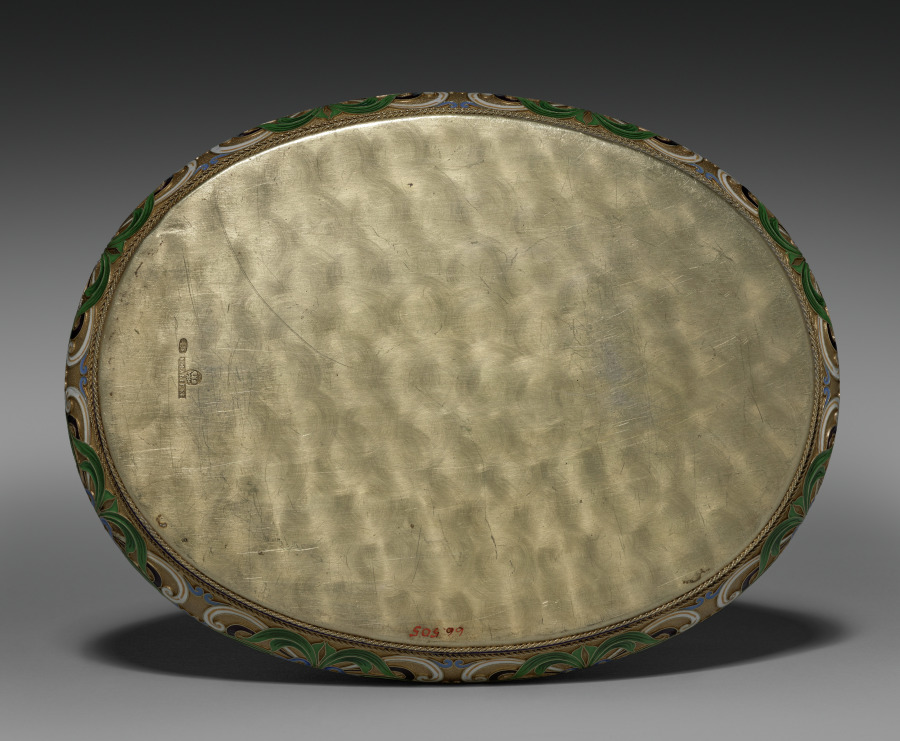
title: Cake Basket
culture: Russia, St. Petersburg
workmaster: attributed to Feodor Ivanovich Rückert (Russian, 1840–1917)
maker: House of Fabergé (Russian, 1842–1918)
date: 1887–96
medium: silver gilt, opaque cloisonné enamel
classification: Miscellaneous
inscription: 88, St. George [assay mark for Moscow, 1882-1896]; C. Fabergé (in Cyrillic); double-headed eagle [imperial warrant]; 10593 scratched.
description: Fabergé’s craftsmen in Moscow, especially under the watchful eye of workmaster Feodor Rückert, became known for their work in the Pan-Slavic or Neo-Russian style, hearkening back to 17th-century motifs of Russian folk art. Often on rather conventional shapes, Rückert and his silversmiths created an explosion of color, achieved through the historic technique of cloisonné enamel in which tiny metal lines are soldered to the surface then filled with glass powders in various colors and fired to create a high gloss finish. The result is a spectacular evocation of the 17th-century originals. Far from mere copies, however, Rückert's designs, such as this tea service, employ naturalistic or abstract motifs in a thoroughly modern adaptation of a remarkable earlier period of Russian art and decoration.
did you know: This cake basket is part of a larger tea service.